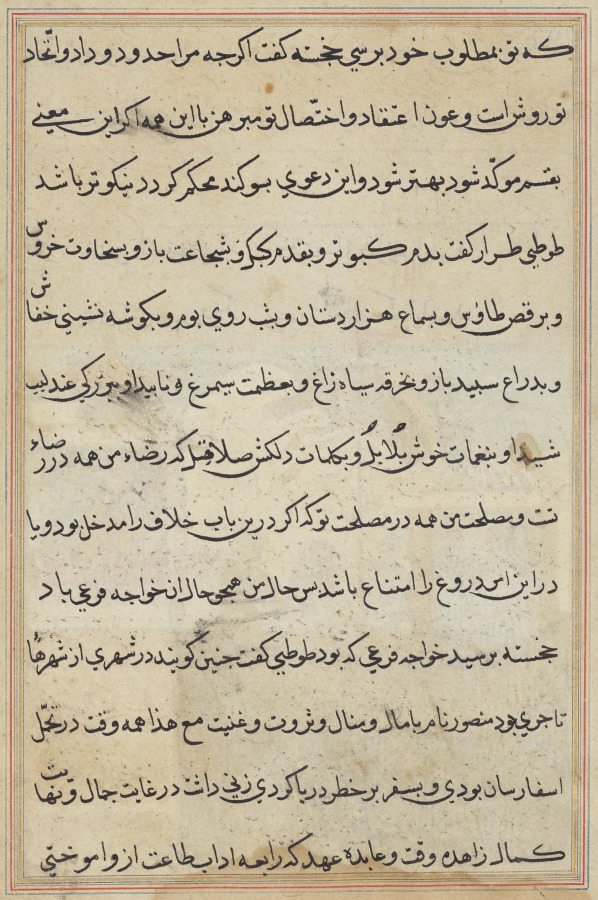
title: Page from Tales of a Parrot (Tuti-nama): text page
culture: Mughal India, court of Akbar (reigned 1556–1605)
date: c. 1560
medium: gum tempera, ink, and gold on paper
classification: Painting